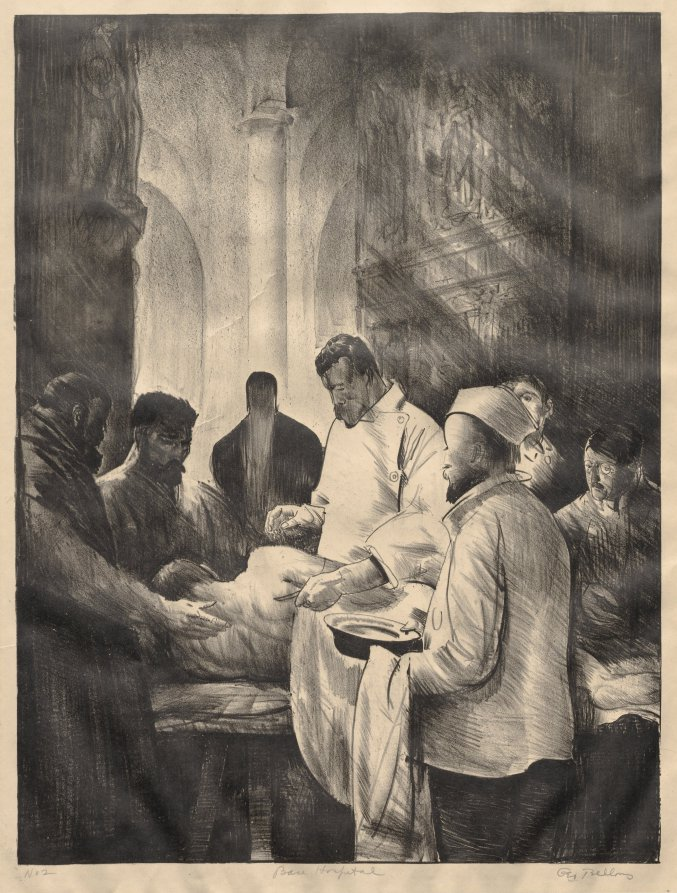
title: War Series: Base Hospital, Second Stone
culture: America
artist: George Bellows (American, 1882–1925)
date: 1918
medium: lithograph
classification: Print